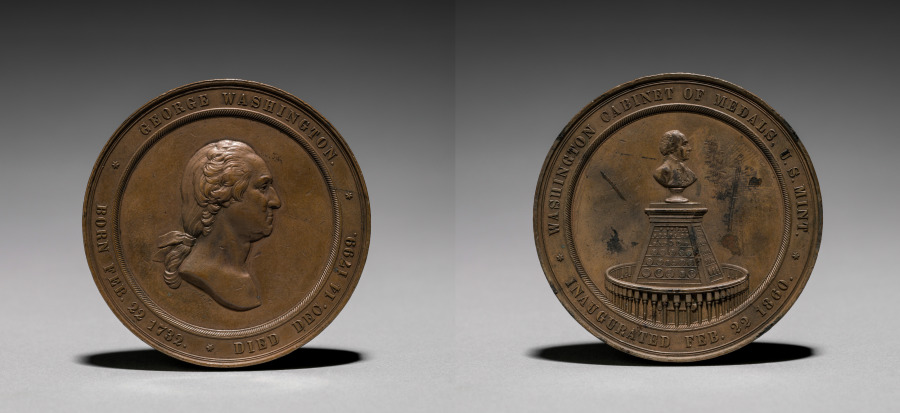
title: Medal: George Washington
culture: France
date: 1860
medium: bronze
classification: Metalwork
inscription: George Washington, Born Feb. 22, 1732. Died Dec. 14, 1799.